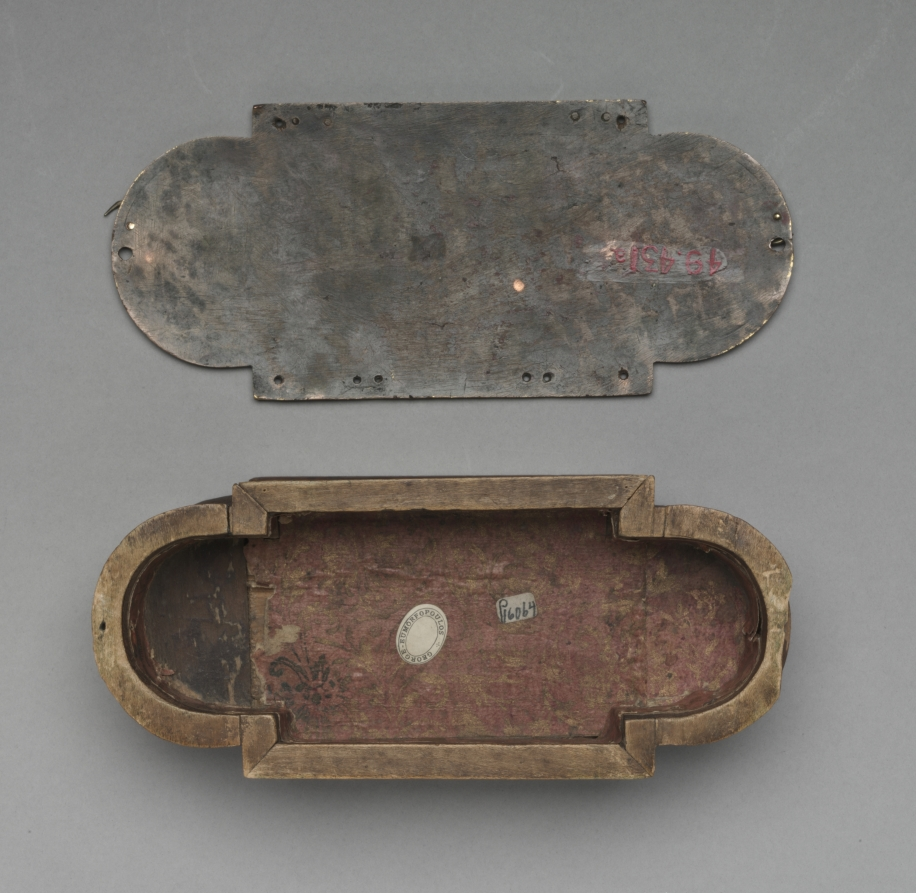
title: Pyx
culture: Germany, Lower Saxony, Hildesheim?, Romanesque period, enamels: 12th century; wood core: 19th century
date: c. 1170–1180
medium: gilded copper, champlevé and cloisonné enamel, wood core (modern)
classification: Enamel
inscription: + H[A]EC DATA P[ER] IVSTV[M] […]AT IN CRVCE VICTIMA CHR[ISTV]M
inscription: + HOC ARIES P(RE)FERT Q[VO]D […] D[EV]S HOSTIA P[ER]FERT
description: The image of Christ’s crucifixion dominates this enameled box. Personifications of the Christian church, the Jewish faith, and the Virgin and Saint John flank the cross. Two Old Testament scenes--Abel’s sacrifice of sheep and Abraham’s sacrifice of Isaac--appear on either side. The box once served as a pyx, a container for the consecrated host, itself a symbol of Christ’s sacrifice.